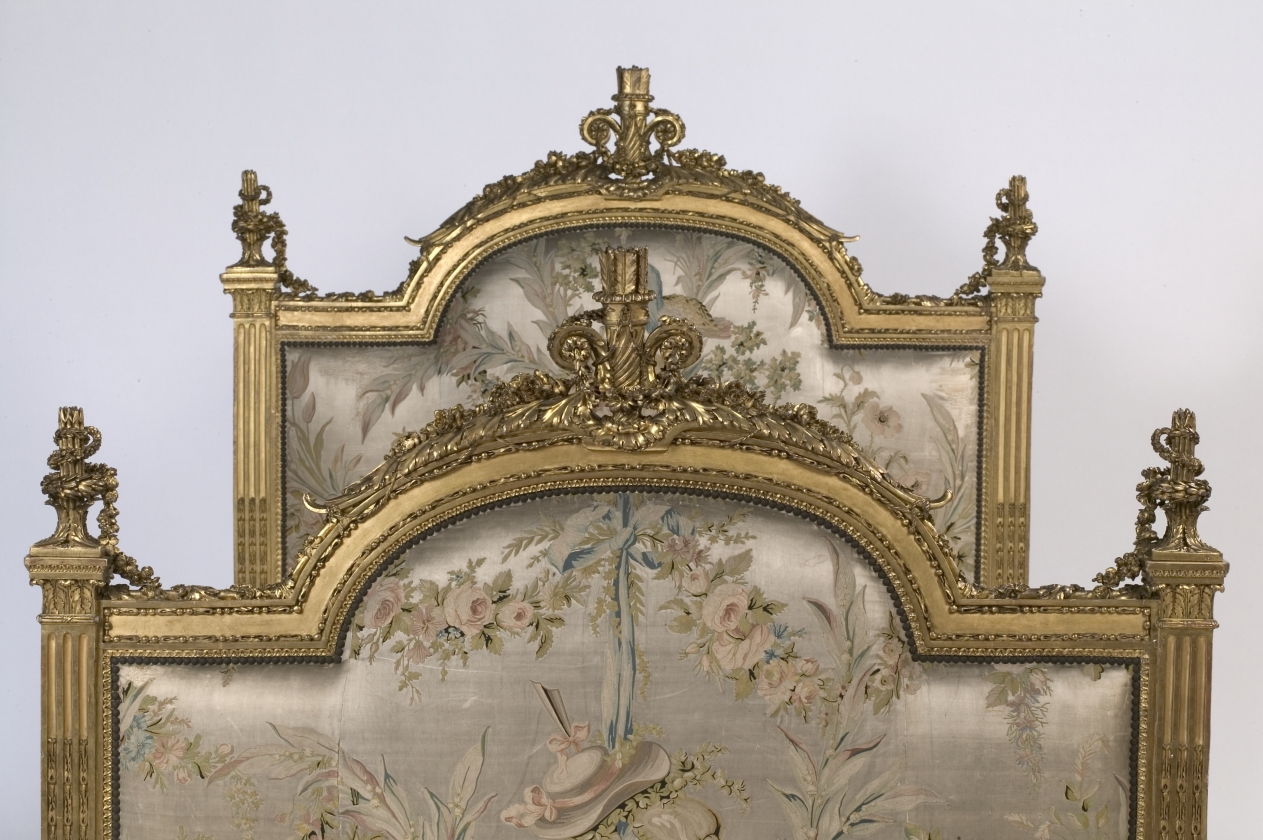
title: Bed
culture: France, 18th century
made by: attributed to Georges Jacob (French, 1739–1814)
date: 1700s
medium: gilded wood and embroidered satin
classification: Furniture and woodwork